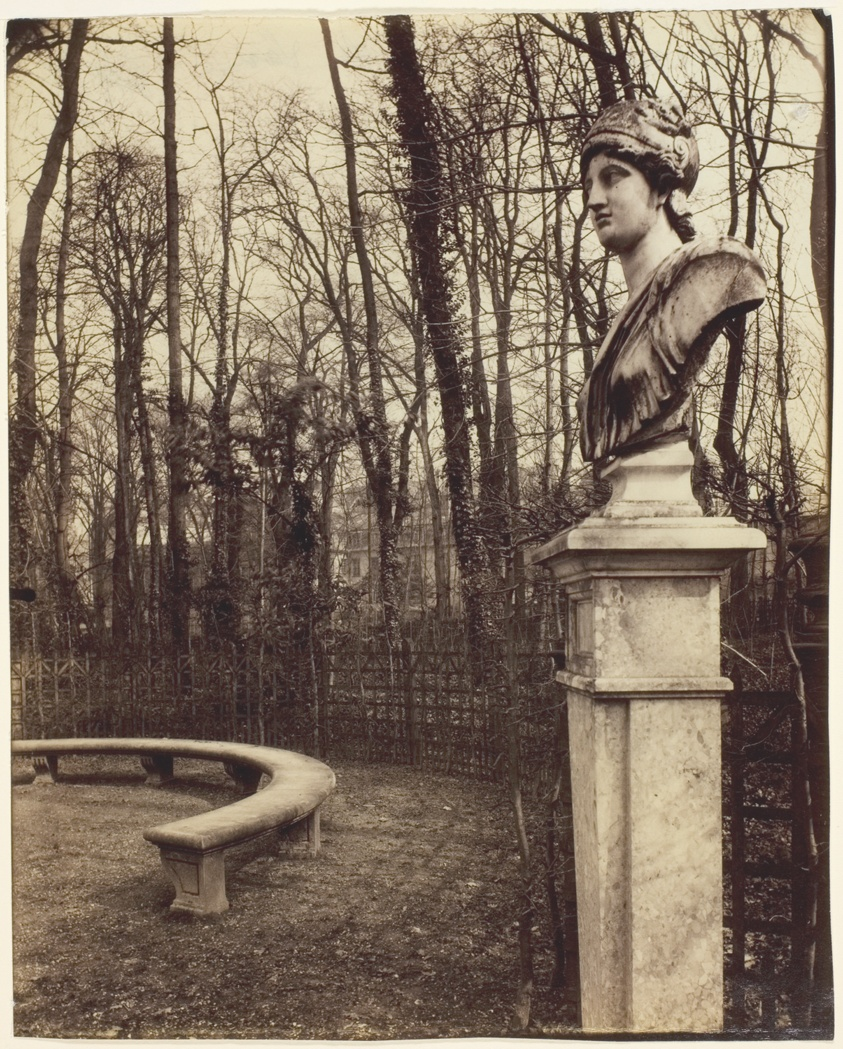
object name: Photograph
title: Versailles, Bosquet de l'Arc de Triomphe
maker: Jean-Eugène-Auguste Atget (French, 1857–1927)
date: 1904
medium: Albumen print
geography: France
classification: albumen silver print; photographic process; photography; photograph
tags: Collected by Hugh Edwards